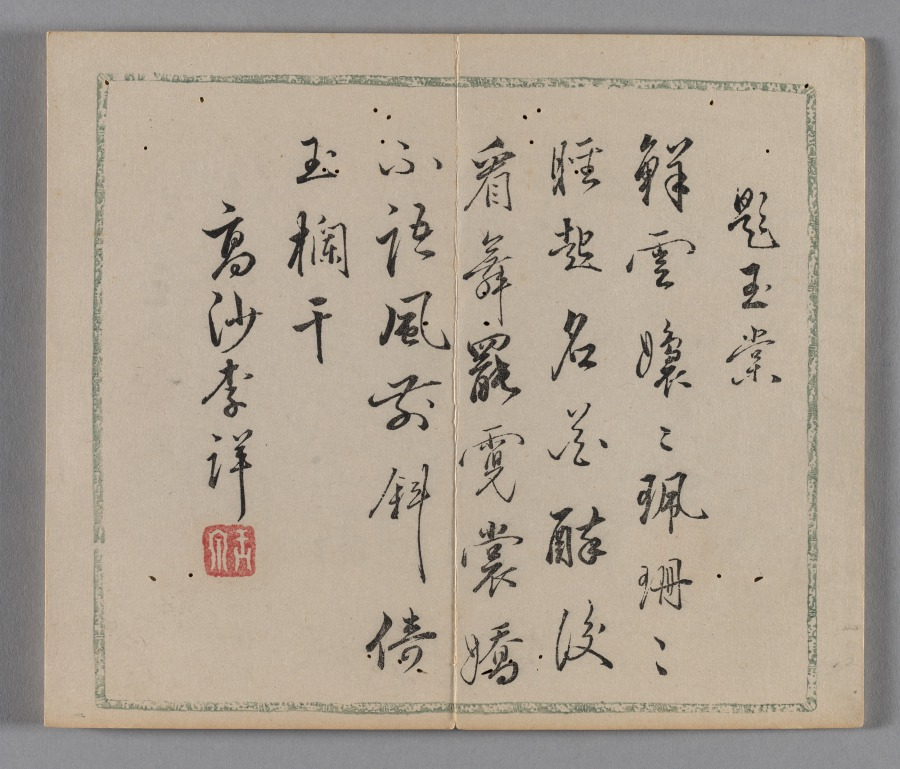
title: Ten Bamboo Studio Collection of Calligraphy and Painting: Round Fans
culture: China, Qing dynasty (1644-1911)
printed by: Hu Zhengyan (Chinese, c. 1584–1674)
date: 1633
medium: Woodblock-printed book; ink and colors on paper; first edition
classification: Print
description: Color printing reached a level of perfection in the early 1600s, as seen in this Ten Bamboo Studio Collection of Calligraphy and Painting and the Mustard Seed Garden Manual of Painting (printed 1679 and 1701). The painterly quality, precision in registering (aligning) the woodblocks, and harmonious colors made them the most successful color print editions in Chinese history. Both editions were printed and compiled in Nanjing, spread nationwide, and had a great impact on the arts in Japan and Korea.